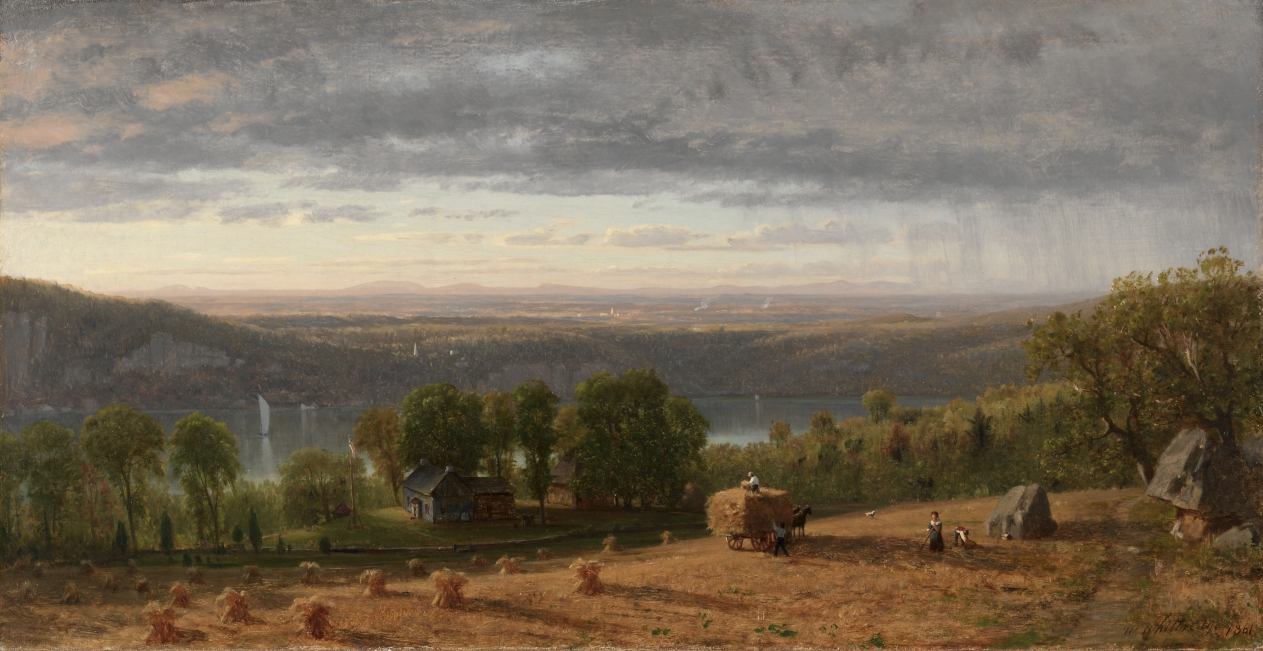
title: Landscape with Haywain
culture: America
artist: Worthington Whittredge (American, 1820–1910)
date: 1861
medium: oil on canvas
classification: Painting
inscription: Signed lower right: "W. Whittredge 1861"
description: Painted during the first year of the Civil War, this idyllic view of a farm near Dobb's Ferry, New York, proclaimed to Northern viewers the success of an agricultural system in which farmers worked their own land. The American flag hanging beside the homestead subtly alludes to the war. Such a scene was thus a critique of Southern slavery. Yet the beauty of the landscape, the wagon carrying a bountiful harvest of hay and the long afternoon shadows, also offers an optimistic image of harmony between man and nature.